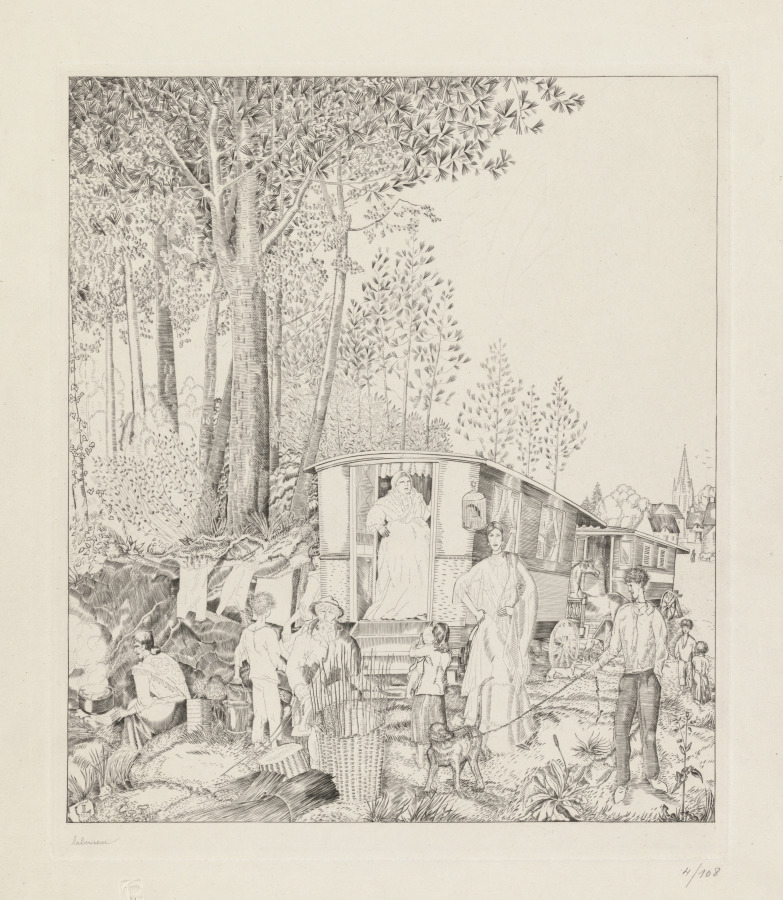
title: La Halte des Bohémiens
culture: France, Early 20th century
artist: Jean-Émile Laboureur (French, 1877–1943)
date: 1938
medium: engraving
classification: Print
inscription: In plate, lower left: L1939; lower left margin, in graphite: Laboureur; lower right, in graphite: 4/108